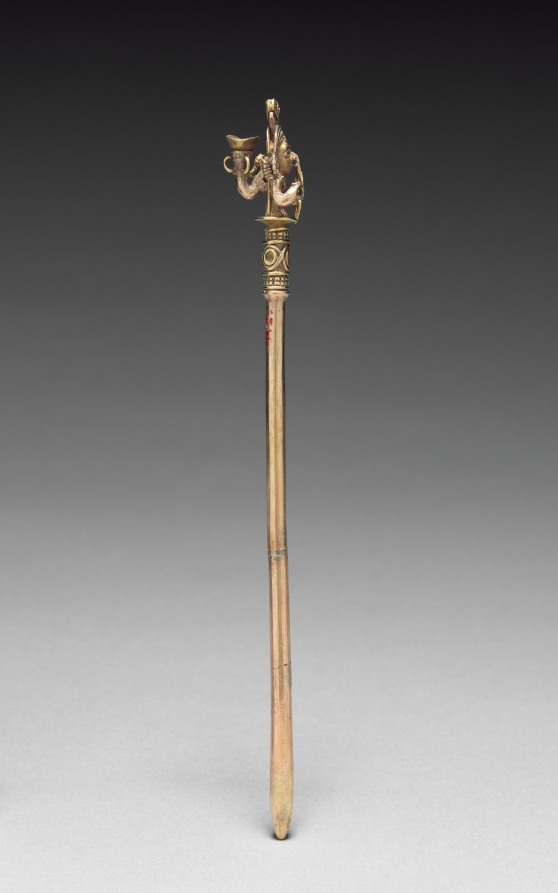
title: Lime Dipper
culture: Colombia, Calima region, Yotoco style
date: c. 1–800 CE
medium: gold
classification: Metalwork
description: Coca-leaf chewing was a widespread ritual in ancient South America. Utensils included a container and a dipper or spoon for powdered lime (made from seashells), added to the coca to enhance its gentle, stimulating effect. Colombian cultures are especially known for transforming these utensils into works of art made of precious metal. The image on the tallest dipper is wonderfully complex. A serpent coils at the bottom, beneath a snarling animal with a huge, vertical tail. This animal has a tiny monkey on its back; the monkey also has a huge tail, which rests on the first animal’s head like a headdress. This intricate image was created with the lost-wax casting process.